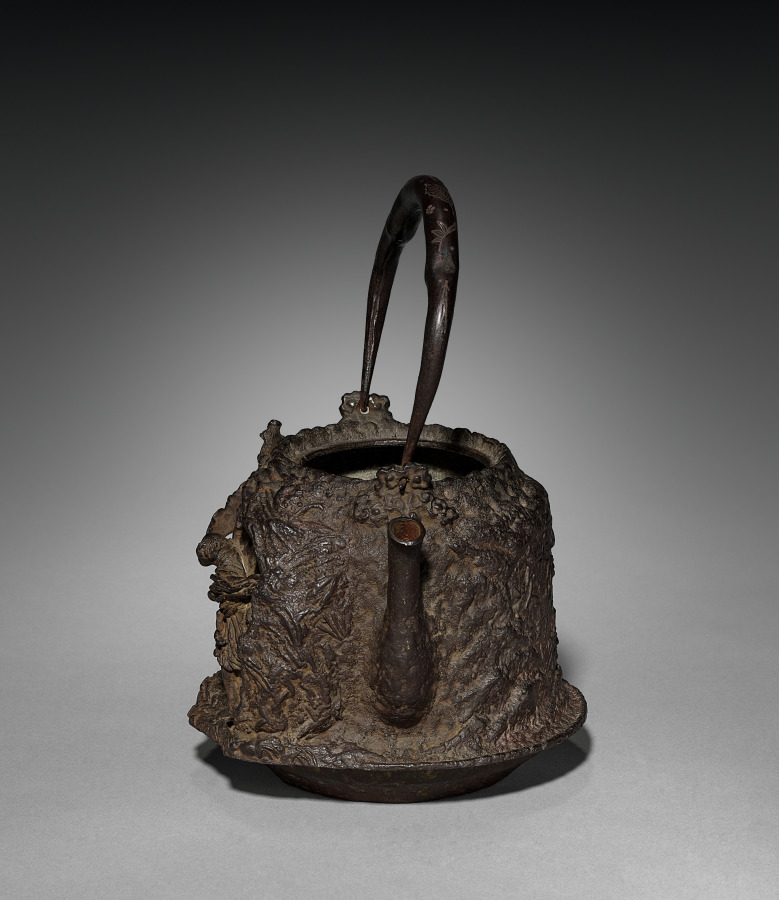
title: Covered Tea Kettle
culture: Japan, Edo period (1615–1868)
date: 1615–1868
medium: iron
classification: Metalwork